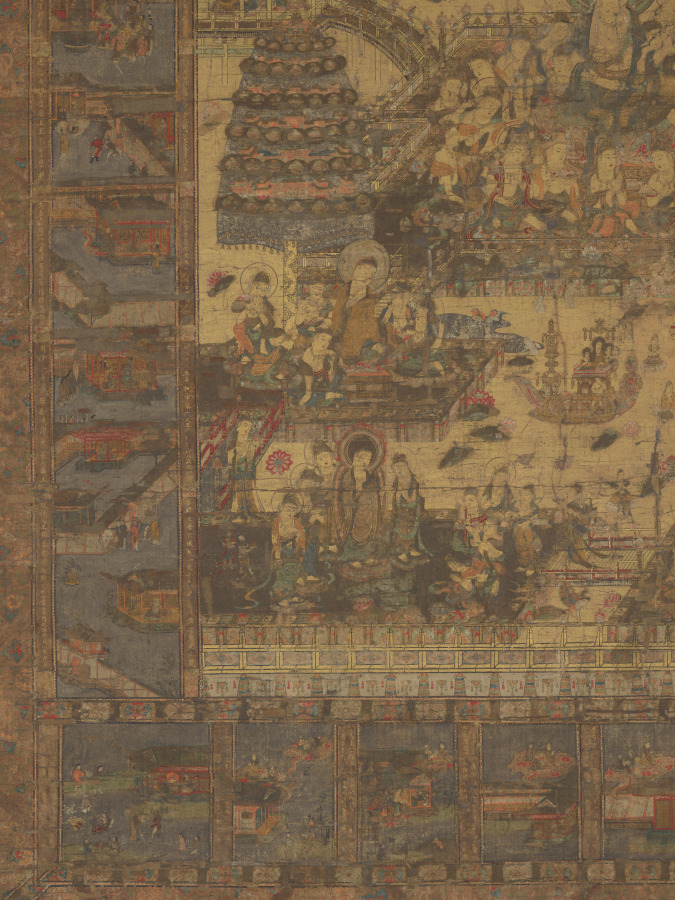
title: Taima Mandala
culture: Japan, Kamakura period (1185–1333)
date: early 1300s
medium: hanging scroll; ink, color, and gold on silk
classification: Painting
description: This painting is a copy after an 8th-century woven mandala belonging to the temple Taimadera. The composition is based on a sacred text that describes the Buddha Shakyamuni’s explanation of Amida’s Pure Land to Queen Vaidehi, as well as his instructions to her on visual meditation upon the Pure Land. The Pure Land appears at the center of the painting. To the left is the story of Queen Vaidehi’s encounter with Shakyamuni, and to the right are the scenes she is given to visualize. The bottom illustrates the nine levels of birth that can be attained in the Pure Land.